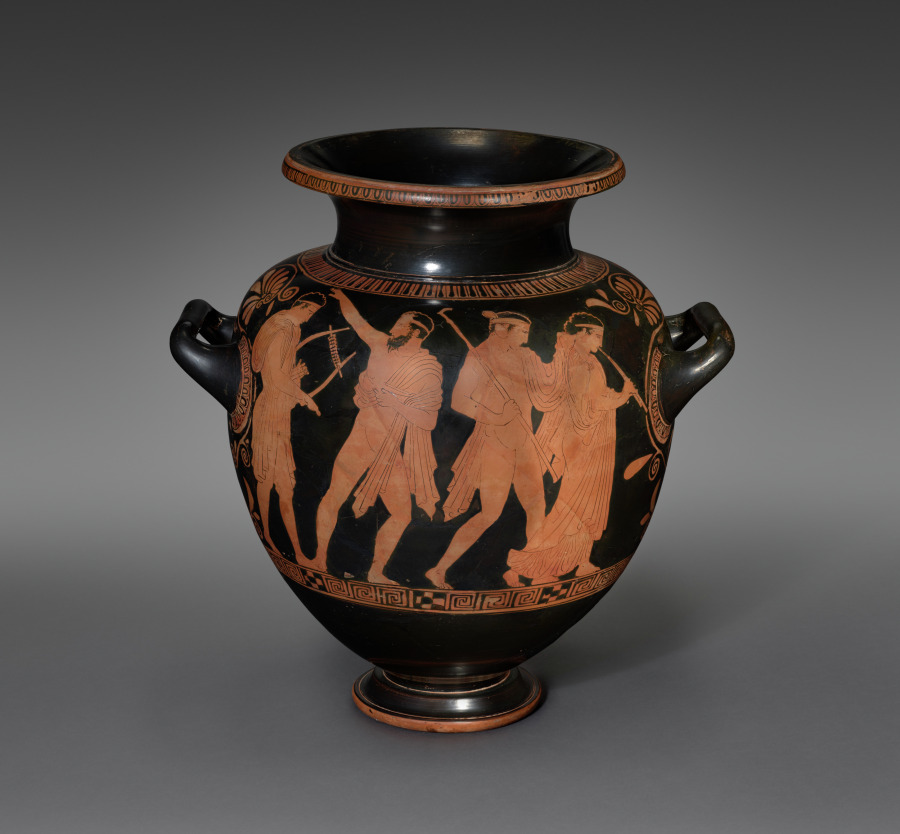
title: Red-Figure Stamnos (Mixing/Storage Vessel): Komos (Musicians and Revelers)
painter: attributed to Kleophon Painter (Greek, Attic, active c. 440–410 BCE)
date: c. 435–425 BCE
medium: Ceramic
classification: Ceramic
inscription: Κ Α Λ Ο Σ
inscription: Κ Α Λ Ο [Σ]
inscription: black '080'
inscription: black 'WF2'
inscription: black '0.19'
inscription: red '09.6'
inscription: partially removed red and white sticker, with number blacked out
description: Four lively figures move to the right across the front side of this stamnos, a vase used for storing and mixing wine. First comes a finely dressed woman playing the pipes, followed by three male figures, all nearly nude. The bearded one holds a drinking cup and reaches back, perhaps dancing, while the last in line concentrates on the music of his lyre.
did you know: The Athenian stamnos, a shape favored by the Etruscans, was made primarily for export.